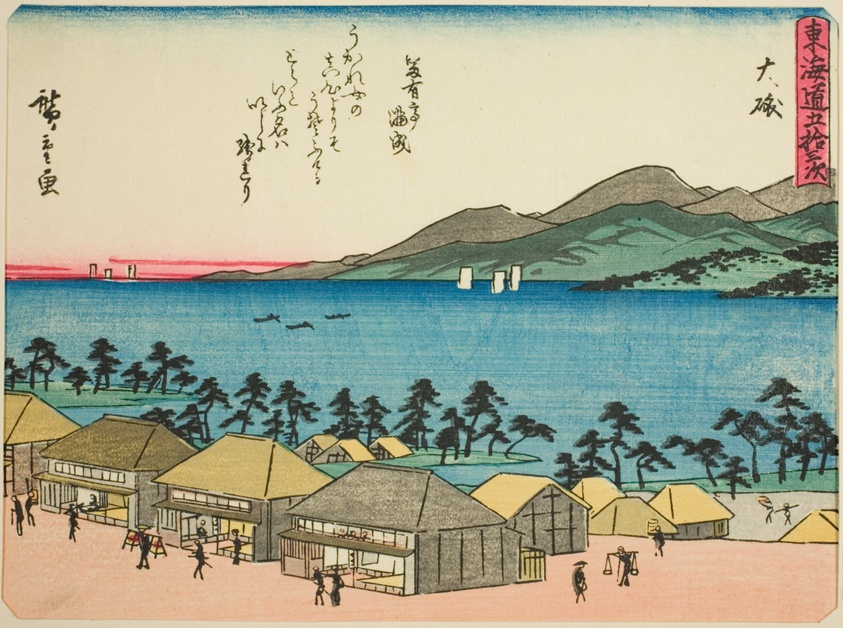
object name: Print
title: Oiso, from the series "Fifty-three Stations of the Tokaido (Tokaido gojusan tsugi)," also known as the Tokaido with Poem (Kyoka iri Tokaido)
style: Japanese (culture or style)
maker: Utagawa Hiroshige 歌川 広重; Japanese, 1797-1858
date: c. 1837/42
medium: Color woodblock print; chuban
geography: Japan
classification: woodblock print; print; asian art